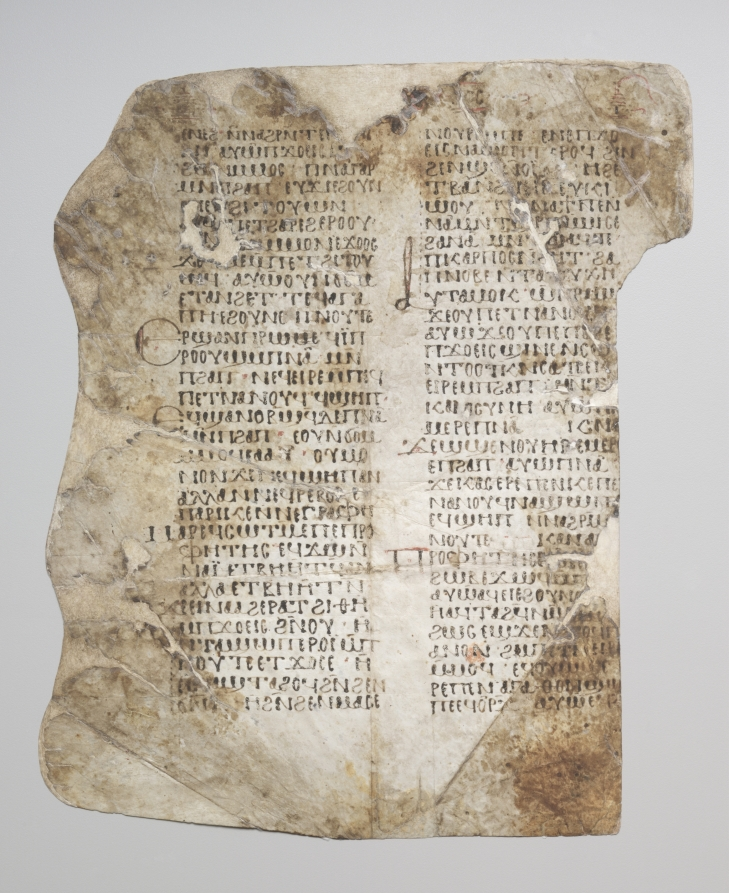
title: Leaf from a Christian Homily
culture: Egypt, Coptic period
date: 500s-600s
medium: ink on vellum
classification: Manuscript